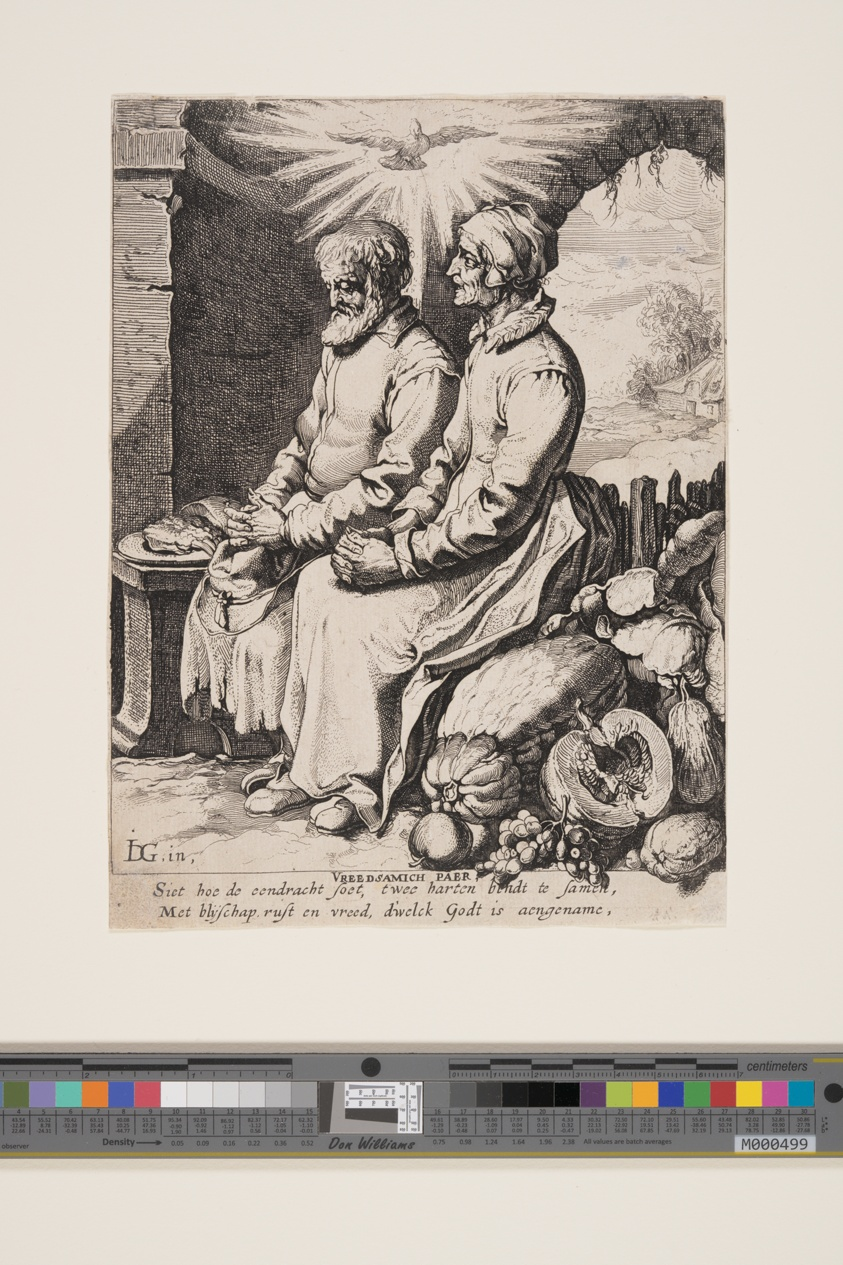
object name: Print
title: The Pious Old Couple (Vreedsamich Paer)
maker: Jacques de Gheyn III; Dutch, c. 1596–1641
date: c. 1618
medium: Etching on laid paper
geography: Netherlands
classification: etching; paper; print; prints and drawing